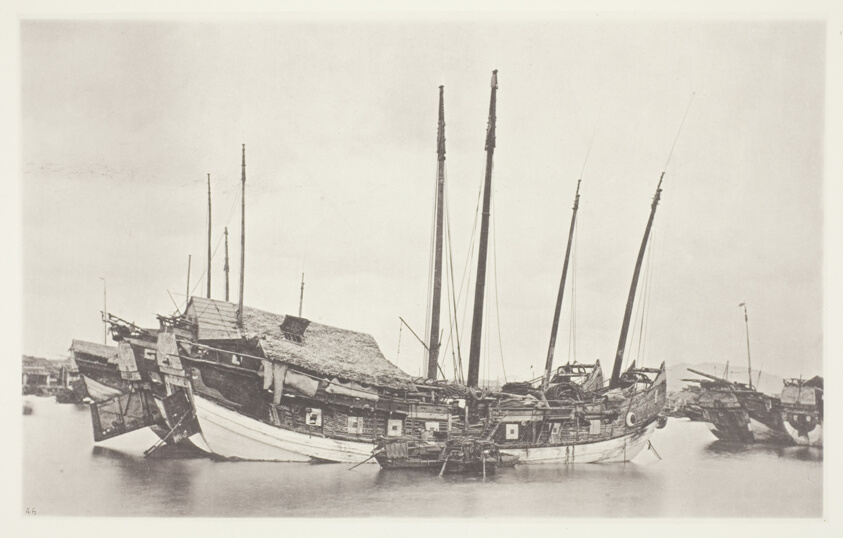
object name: Photograph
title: Old Junks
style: 19th century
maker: John Thomson (Scottish, 1837–1921)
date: c. 1868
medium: Collotype, pl. XIX from the album "Illustrations of China and its People, Volume II" (1873)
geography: Scotland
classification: photography; photograph